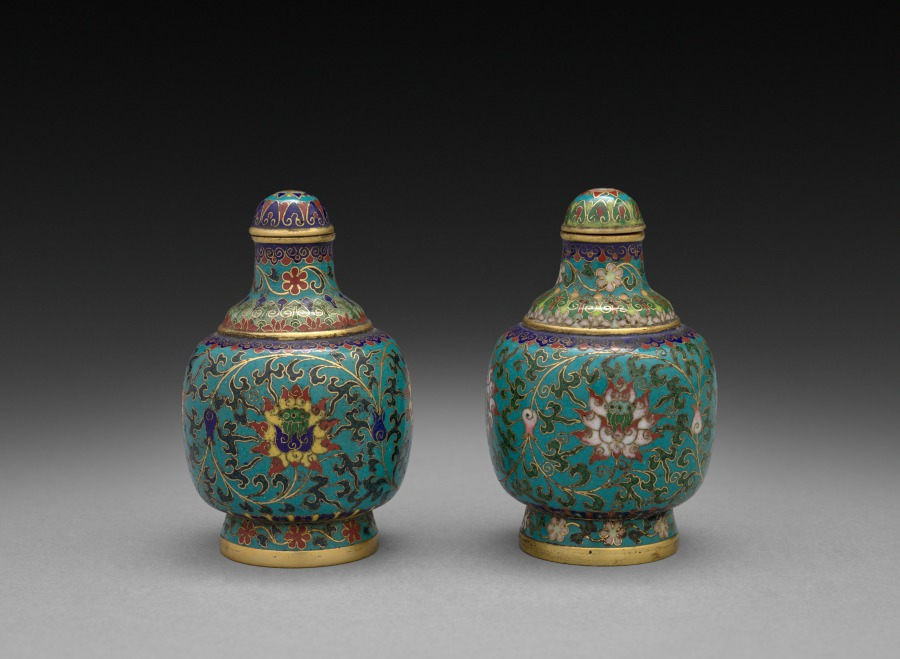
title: Pair of Snuff Bottles with Floral Scrolls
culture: China, Qing dynasty (1644-1911), Qianlong mark and reign (1736-95)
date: 1736–95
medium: cloisonné enamel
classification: Enamel